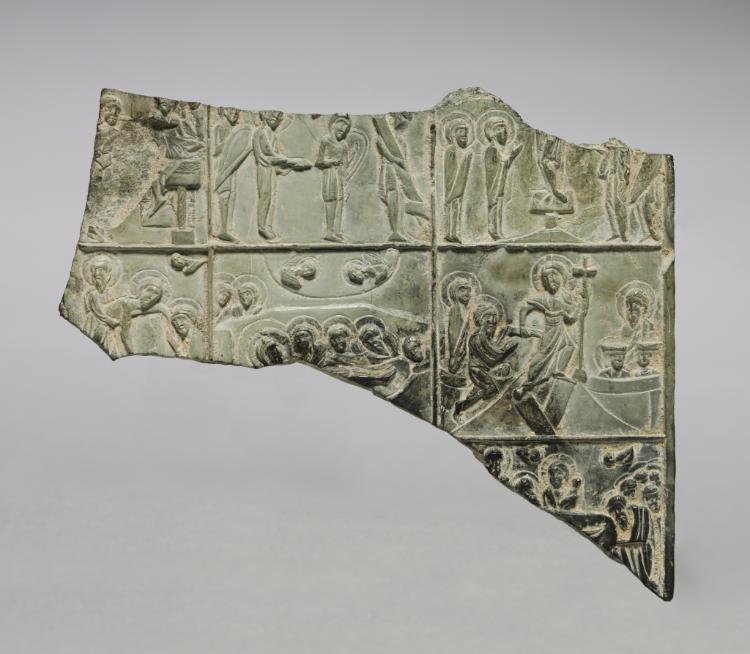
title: Fragment of an Icon with Scenes from Christ's Passion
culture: Byzantium, Byzantine period, 12th century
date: 1100s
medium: steatite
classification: Glyptic